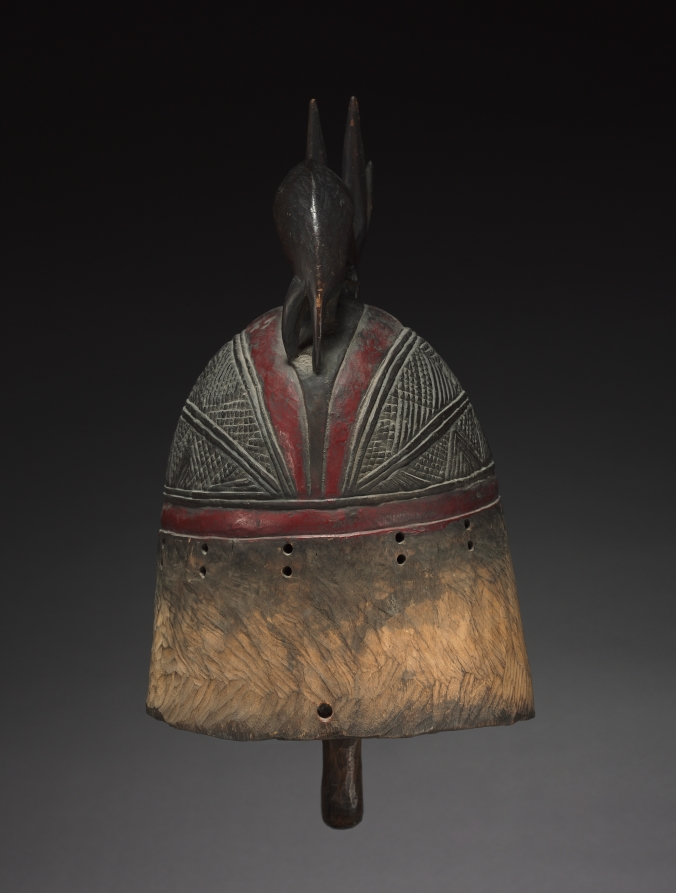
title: Mask (hemba)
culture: Africa, Central Africa, Democratic Republic of Congo, Suku-style carver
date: late 1800s–early 1900s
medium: Wood, reed, paint, and metal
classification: Mask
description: Suku helmet masks are often used in initiation ceremonies for young men in the society. Helmet masks such as this represent images of deceased elders in the society. They are to ensure successful hunting, help cure illnesses, and protect its wearer from evil. The animal shaped like a gazelle or antelope is typically associated with folktales, proverbs, and personal hunting exploits.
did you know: Suku helmet masks are often used in initiation ceremonies for young men in the society.